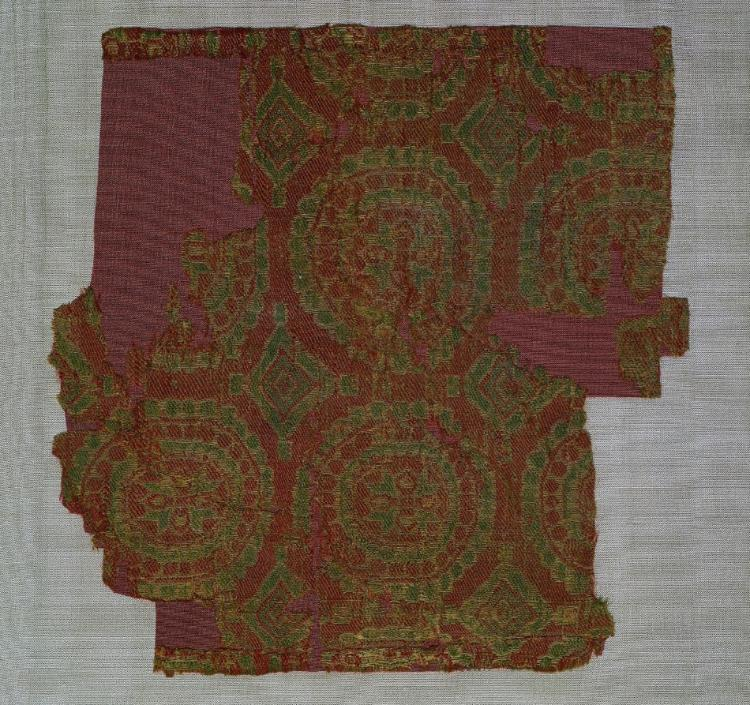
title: Samite with roundels of rosettes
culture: Iran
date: 700s-800s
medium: samite: silk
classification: Textile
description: This is one of a large number of silks woven with geometric designs that have traditionally been attributed to Sogdiana. However, the untwisted warps and light weight of the silk indicate that it was woven farther east in Central Asia where Sogdian influence was strong. Similar geometric patterns occur on clothing depicted in paintings found in the Khotan oasis. That region maintained close cultural and economic ties with Sogdiana. Whether this silk was woven in the Khotan oasis or elsewhere in Central Asia is not known.